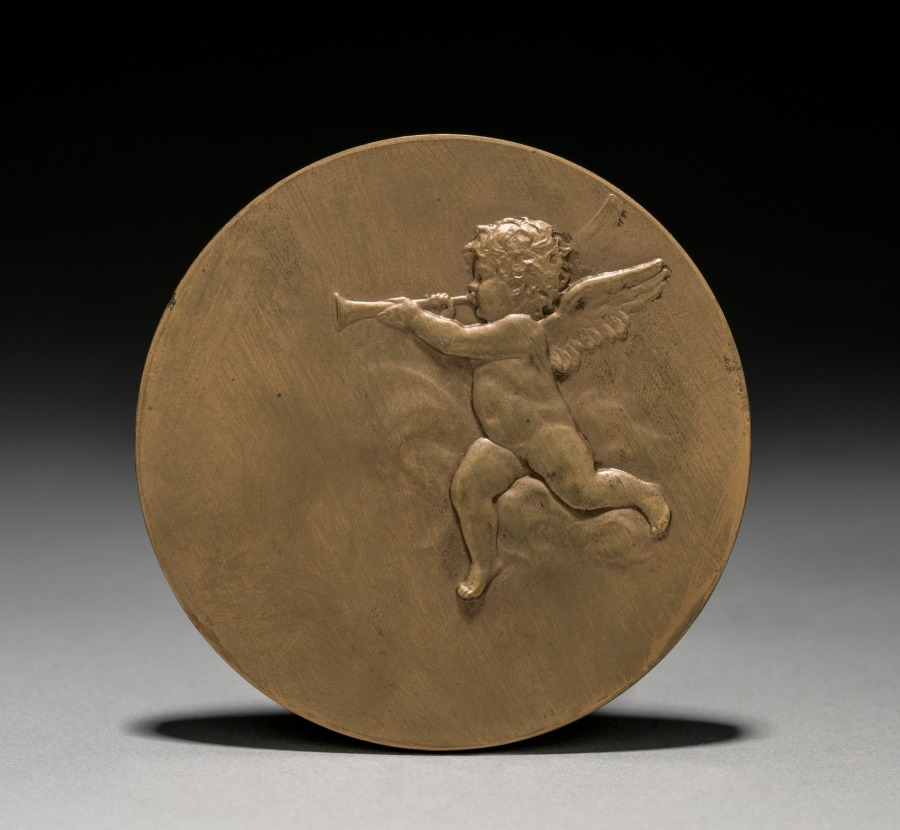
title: Medal: Motherhood (reverse)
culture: America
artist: Victor D. Brenner (American, 1871–1924)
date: 1911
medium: bronze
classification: Metalwork